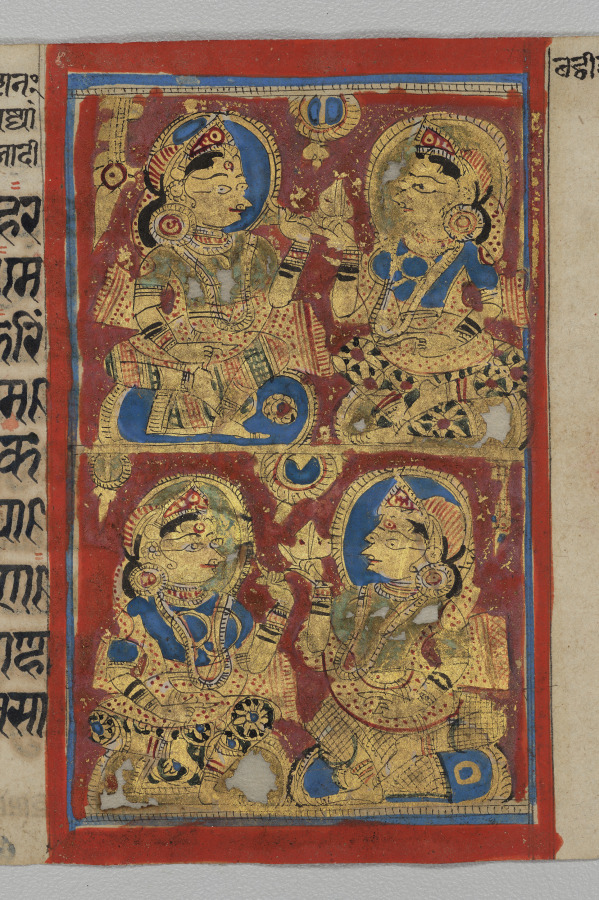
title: Vigil on the Sixth Night After Mahavira's Birth, Folio 33 (recto), from a Kalpa-sutra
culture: Western India, Gujarat, last quarter of the 15th century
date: c. 1475–1500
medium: Gum tempera, ink, and gold on paper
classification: Painting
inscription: [[upper right]] chatṭhī jāgaraṇa